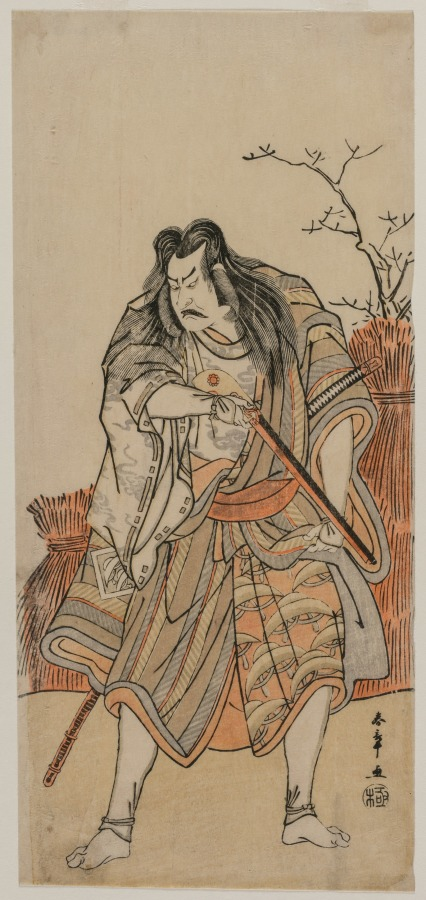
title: Nakajima Kanzaemon as a Lord Disguised as a Hunter with a Rifle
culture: Japan, Edo period (1615–1868)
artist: Katsukawa Shunshō (Japanese, 1726–1792)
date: c. early 1780s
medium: color woodblock print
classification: Print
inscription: Signature: Shunsho ga Censorship Seal: kiwame